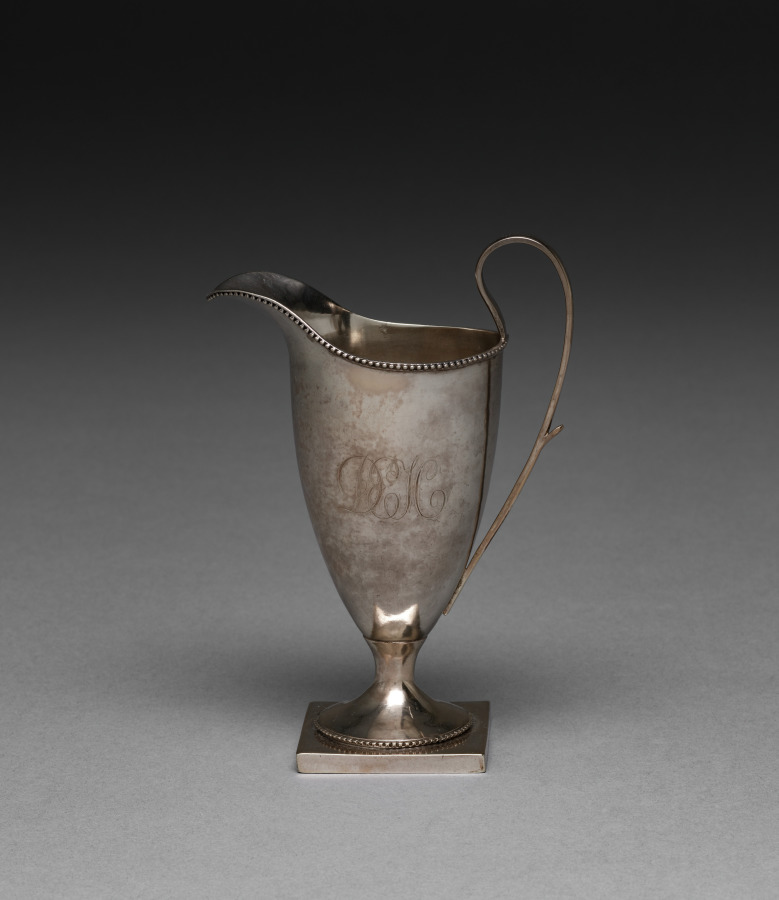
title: Cream Jug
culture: America, Pennsylvania, Philadelphia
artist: attributed to John D. Germon (American)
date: late 1700s–early 1800s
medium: silver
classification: Silver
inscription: engraved in bright-cut script on side of body, to left of handle: DEH.